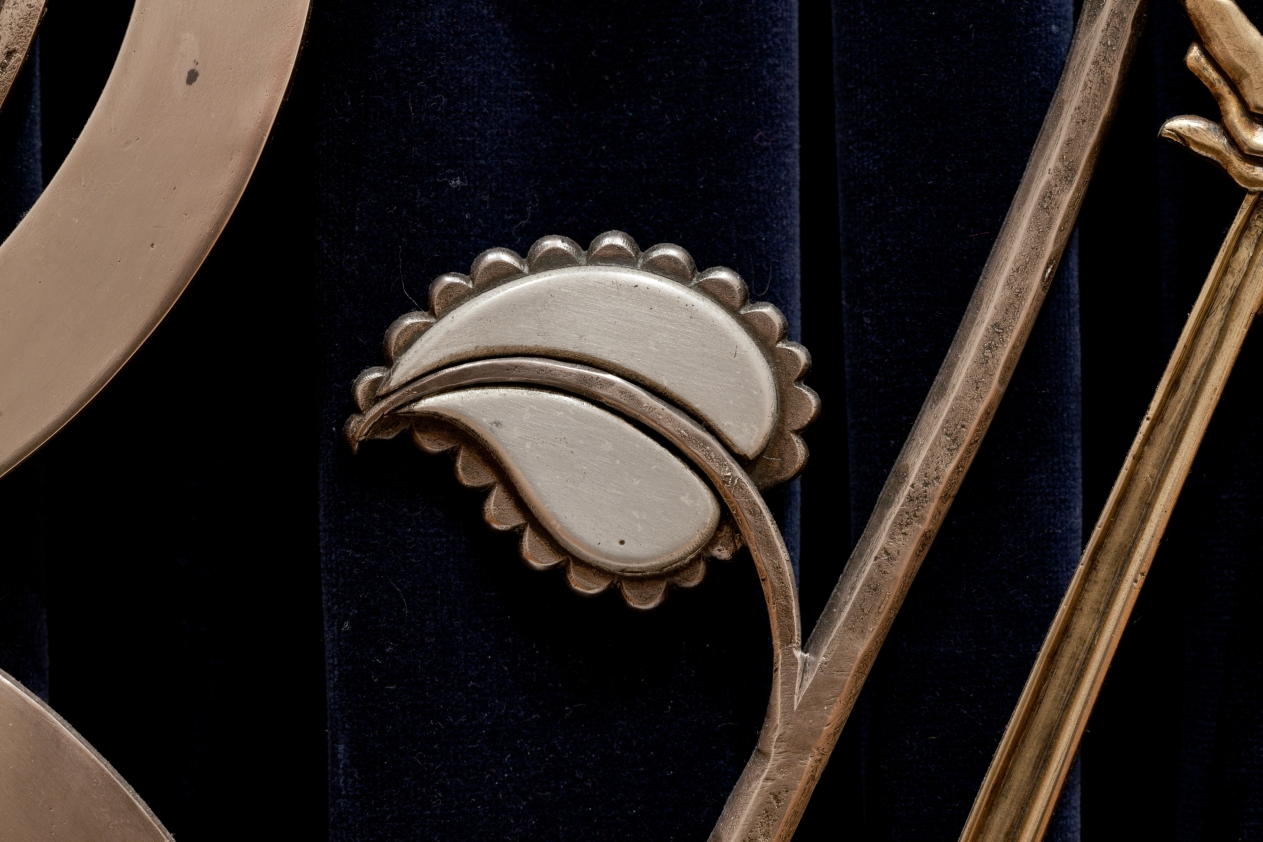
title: Muse with Violin Screen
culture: America, Ohio, Cleveland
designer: Paul Fehér (American, born Hungary, 1898–1990)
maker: Rose Iron Works (America, Ohio, Cleveland, est. 1904)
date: 1930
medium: Steel, brass; silver and gold plating, cotton velveteen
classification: Metalwork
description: Since the early years of the 20th century, the Rose Iron Works, a Cleveland supplier of architectural ornament, has produced distinguished metalwork. The company’s founder, Martin Rose, was born in Austria-Hungary and studied ornamental metalsmithing in Vienna prior to immigrating to Cleveland in 1902. In the 1920s, he hired a talented young Parisian designer, Paul Fehér, to work for the firm. Fehér’s designs, culminating in this massive screen, brought a modern European sensibility to the Rose Iron Works production. With its geometric patterning, highly stylized and abstracted natural forms, and the central figure reminiscent of the celebrated jazz singer Josephine Baker, this screen reflects the classic motifs of Art Deco design.